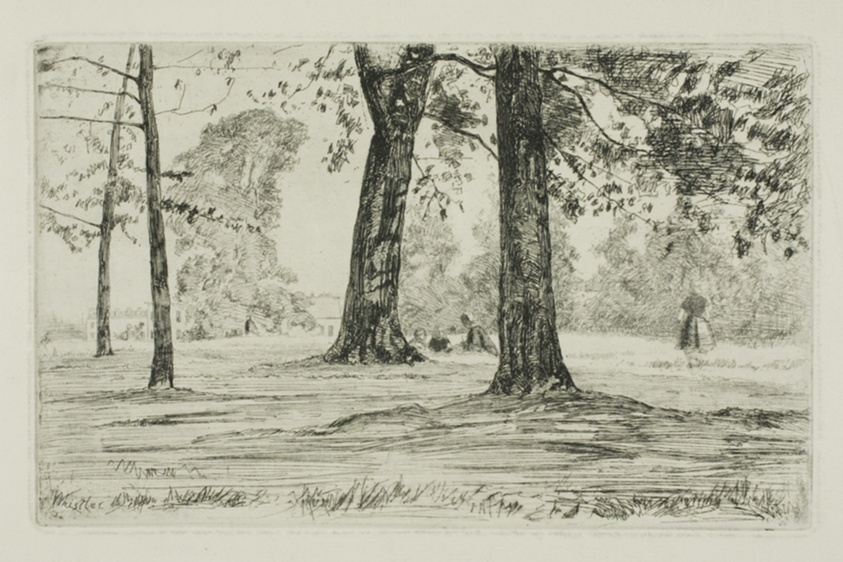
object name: Print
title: Greenwich Park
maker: James McNeill Whistler (American, 1834-1903)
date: 1859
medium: Etching with foul biting in black ink on cream laid paper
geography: United States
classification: etching; foul biting; print; prints and drawing; paper